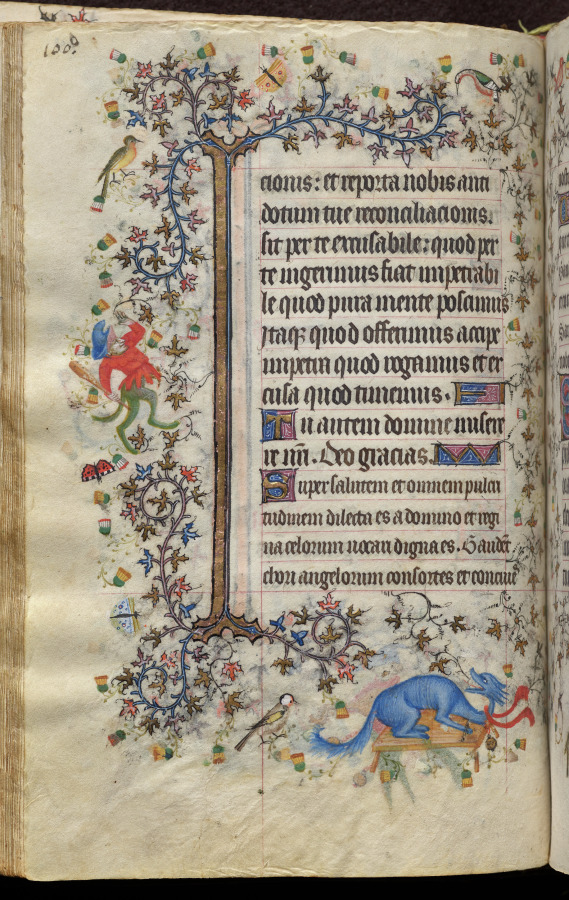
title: Hours of Charles the Noble, King of Navarre (1361-1425): fol. 50v, Text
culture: France, Paris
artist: Master of the Brussels Initials and Associates (French)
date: c. 1405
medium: ink, tempera, and gold on vellum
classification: Bound Volume